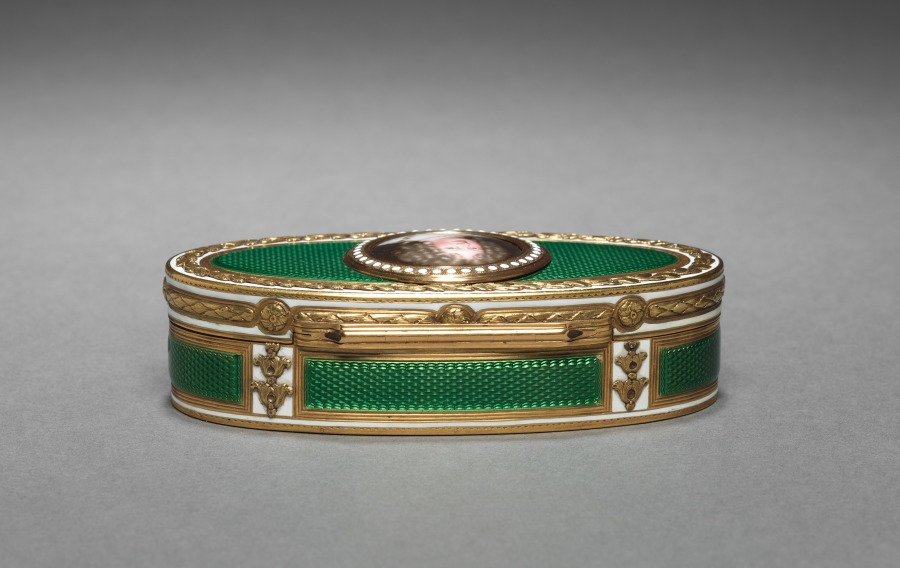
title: Snuff Box (Tabatière) with Portrait of Marie-Thérèse of Austria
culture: France, 18th century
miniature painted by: Jean Petitot (Swiss, 1607–1691)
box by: Charles Le Bastier (French)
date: miniature, c. 1676; box, 1775–76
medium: Gold, enamel, and miniature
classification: Enamel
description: In 18th-century France, ornately enameled boxes that held snuff—powdered tobacco—became a popular accessory in the French court. This box is decorated with a miniature portrait of Marie-Thérèse of Austria, the queen consort of French King Louis XIV. Their union was largely political. A year into their marriage Louis XIV took an official mistress, Madame Pompadour.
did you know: This box resulted from the combined efforts of the popular portrait painter who served the court of French King Louis XIV, Jean Petitot, and master goldsmith Charles Le Bastier.